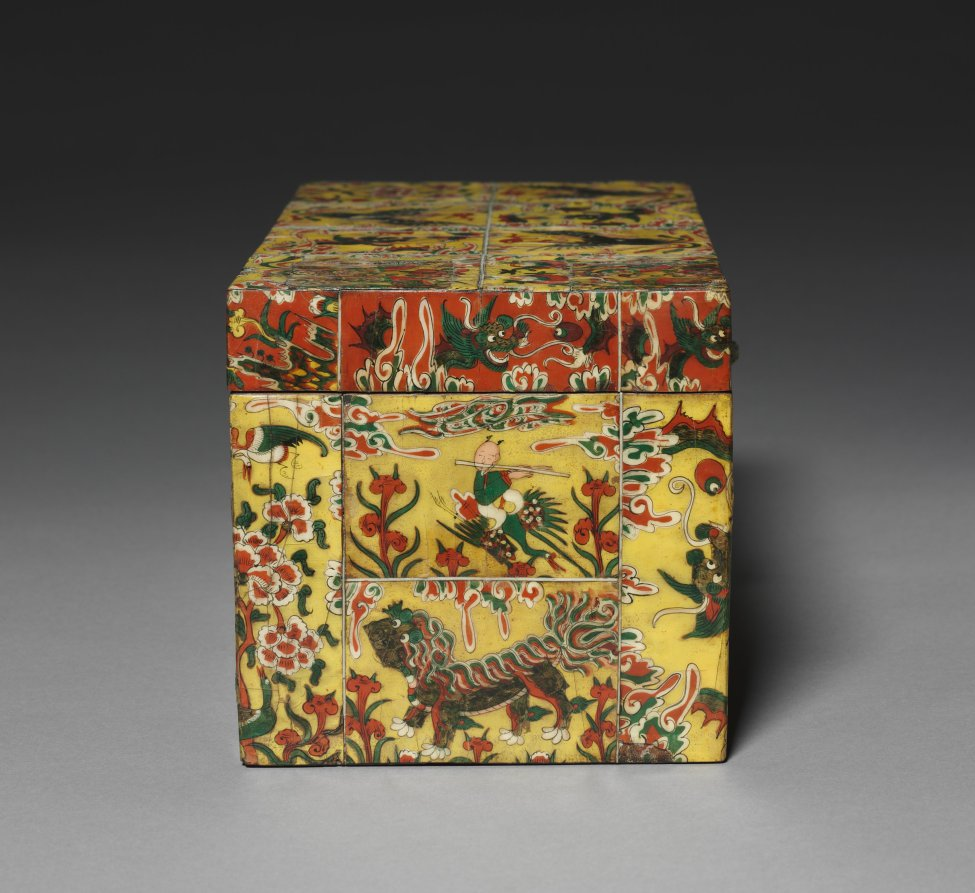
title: Box with Painted Oxhorn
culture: Korea, Joseon dynasty (1392–1910)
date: 1800s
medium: painted wood with flattened ox-horn inlay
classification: Miscellaneous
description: This box is colorfully decorated with the technique of oxhorn plating. The oxhorn was cut, soaked in water, boiled, and then pressed into thin translucent sheets. Since oxhorns are usually rather small, dozens of them were required to fully decorate even a small wooden object. This box is colorfully painted with the imagery of auspicious plants and animals such as dragons amid clouds, a white tiger under the pine tree, a grazing deer, and more. This kind of luxurious box was probably produced as a wedding gift.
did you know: This box is made of small flattened pieces of oxhorn. Since oxhorn is usually rather small, possibly dozens of them were used to fully decorate even a small wooden object like this box.